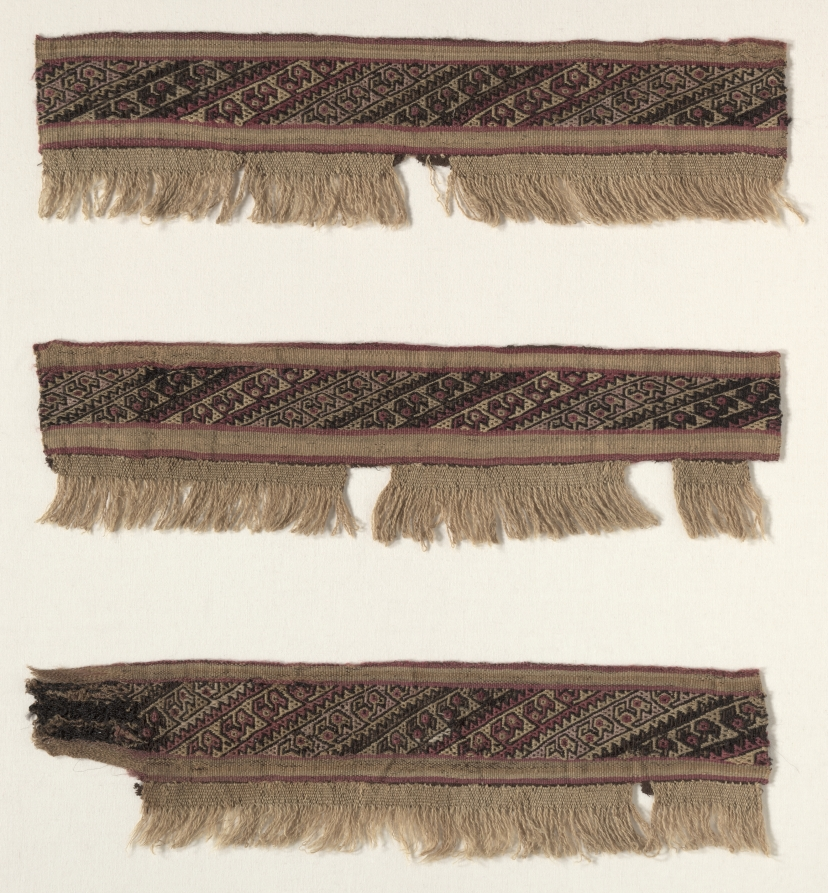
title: Three Fragments of a Border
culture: Peru, Central Coast, Chancay, 12th-15th century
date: c. 1100–1400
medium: tabby with inset border of fancy twill, brocaded; cotton and wool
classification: Textile